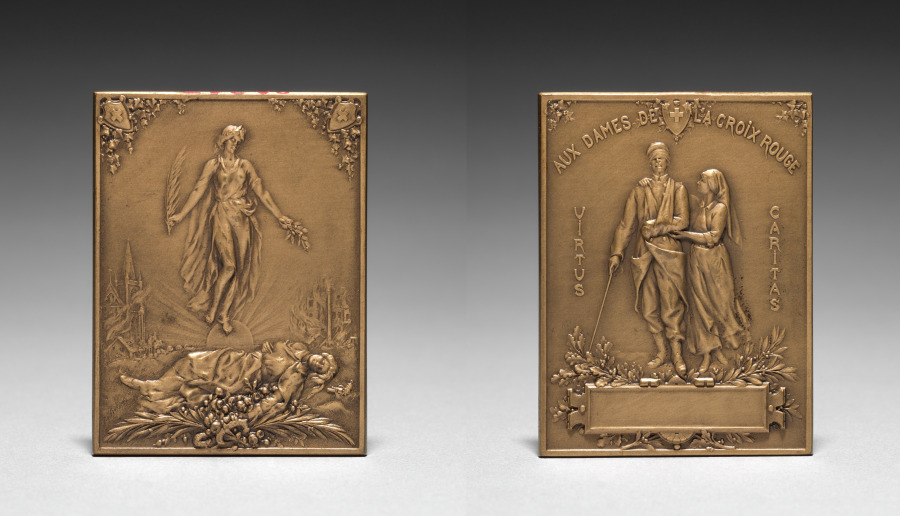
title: Medallion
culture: France, 19th-20th century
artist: Henri Emile Allouard (French, 1844–1929)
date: 1916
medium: bronze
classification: Metalwork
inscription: "Aux dames de la Croix rouge. Virtus Caritas."